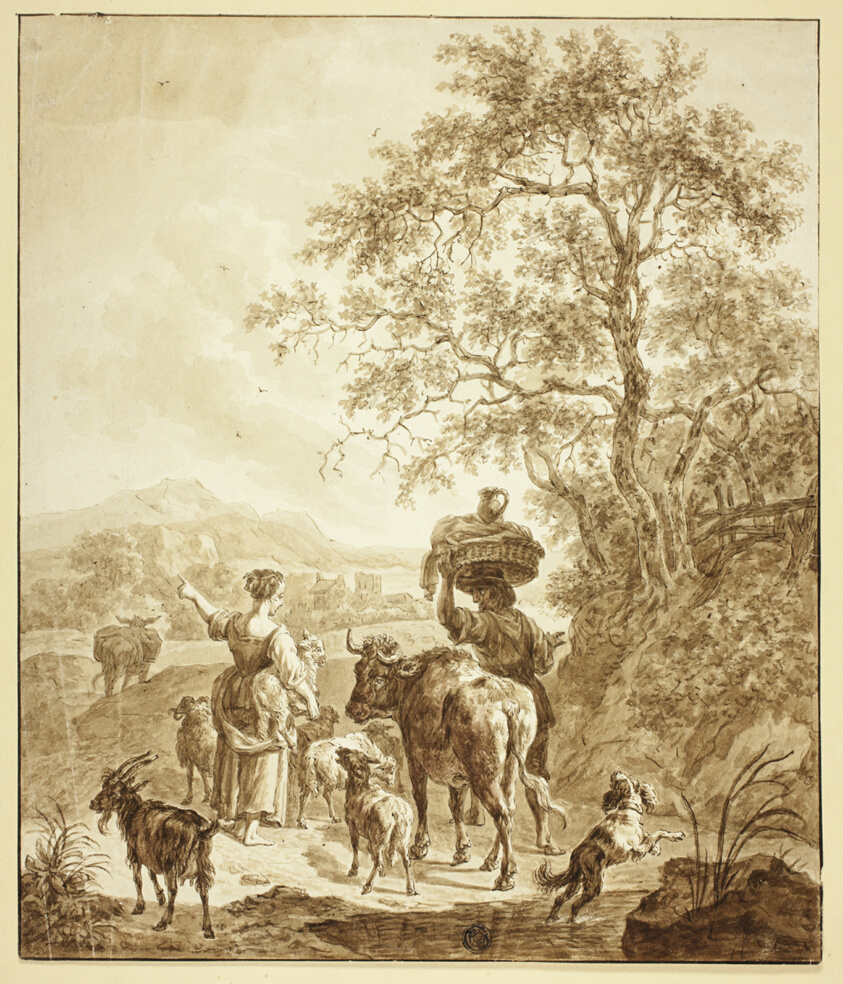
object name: Drawing and Watercolor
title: Shepherdess and Peasant with Flock in Italianate Landscape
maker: After Nicolaes Berchem, the Elder; Dutch, 1621/22-1683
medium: Pen and brown ink and brush and brown wash on ivory wove paper, tipped onto cream card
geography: Netherlands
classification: pen and ink drawings; drawings (visual works); prints and drawing; brush and wash; paper